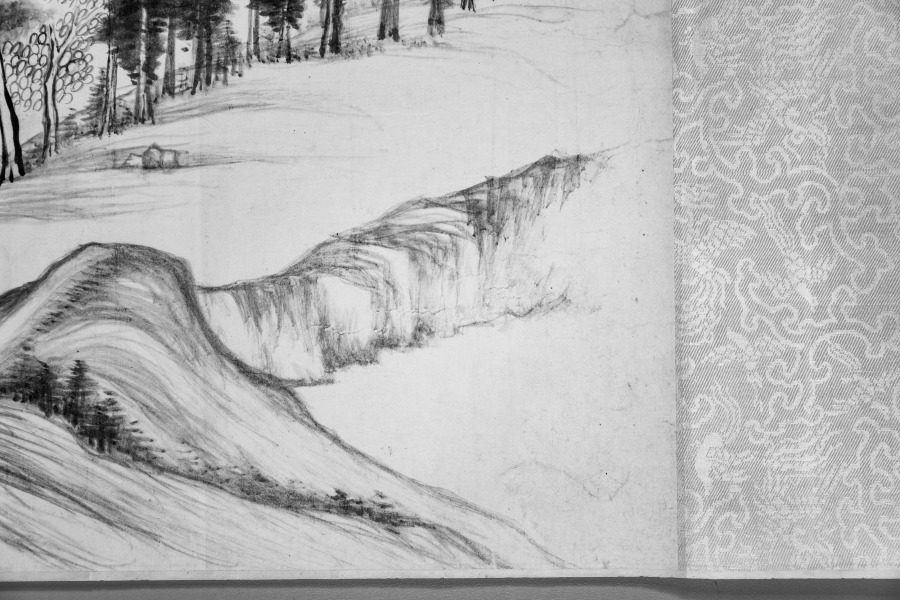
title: River and Mountains on a Clear Autumn Day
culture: China, Ming dynasty (1368–1644)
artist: Dong Qichang (Chinese, 1555–1636)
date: c. 1624–27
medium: Handscroll; ink on Korean paper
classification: Painting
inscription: 黃子久江山秋霽似此，當恨古人不見我也。思翁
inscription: 董文敏每遇高麗鏡面箋，書畫尤為入神。此卷改表紙用之，字跡隱然，兼有朝鮮之印。至於筆法圓秀，真接倪黃。豈文沈所可同日而語也。 康熙庚午中秋後一日，天氣澄爽，重裝初畢，跋於瓶廬。抱瓮翁高士奇。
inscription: Second inscription by Gao Shiqi 高士奇 (1645–1704): On the twenty-third day of the ninth month, the jiaxu year of the Kangxi era [1694], I packed my bags to head north. When my boat passed Wuchang [Suzhou], Mr. Mantang [Song Luo] brought wine to bid me farewell so that we could share our thoughts on our separation in the last few years. I showed him the paintings and calligraphy which I collected and asked his opinions. Since Mr. Mantang does not own any handscrolls by Wenmin [Dong Qichang], I leave this one for him in commemoration of our parting; thus the painting will have a worthy owner and our meeting will become a beautiful story in the future. It is the fourth day after the beginning of winter, with the sky clear and sober. Trees under frost have turned red and yellow, seemingly echoing the brush and ink in the painting. I also ask Mr. Mantang to inscribe a poem to commemorate our meeting so that it will survive forever.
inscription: 1 colophon and 4 seals of Song Luo 宋犖 (1634–1713): Who is the foremost art connoisseur of our dynasty?/ Tangcun [Liang Qingbiao, 1620–1691] is dead, so the title passes to Jiangcun [Gao Shiqi]./ Leaving office, you retired for five years in the Lake region./ Fondling handscrolls and hanging scrolls from morning to evening./ You sent me your collection catalogue Xiao Xia Lu last year;/ It is indeed the true equal of [Zhou Mi's] Yun Yan Guo Yan./ This year you returned to the capital by imperial order;/ Your boat with calligraphy and paintings anchored at the river bank in Suzhou./ When we met each other you did not waste any time for conversation by poured out immediately/ From your "coral net" extraordinary treasures./ You produced incomparable scrolls, with gold-inscribed labels and jade rollers,/ Pouring out from bags and trunks, they were spread in disarray./ Without a word, I rolled and unrolled until my fingers were numbed,/ We sat straight, facing each other quietly, and never felt tired./ For three days we forgot about sleeping and food./ And at times we shouted our joy out loud, forgetting who is host or guest./ Your Dwelling in the Fuchun Mountains and the Yuansheng manuscript/ These peerless works I myself examined with delight./ As an added pleasure to the farewell dinner under the Maple Bridge,/ You allowed me to hold again this handscroll by Dong Qichang--/ The Misty River and Piled Peaks [by Zhao Mengfu] and this Clear Autumn Day are two extraordinary masterpieces./ In showing such life and spirit with "qi yun." the artists were truly "men of heaven."/ The Clear Autumn Day is not even three feet long,/ Painted on tributary Korean paper, it shines like silver./ Every building up and every turn of the mountains imitates nature,/ Every tree and every rock is removed from the commonplace./ From the beginning, the theory of poetry is the theory of painting,/ Like the lotus and the morning sunshine, they complement and refresh each other./ The artist's inscription regrets that "the Old Masters cannot see my scroll."/ Huang Gongwang would have agreed in his grave./ The vermilion of the seals glitter and dazzles the eyes,/ These added accessories are as valuable as jade./ You are very kind to give it to me,/ The feelings expressed in your inscription are so sincere./ Wanting to refuse, but unable, I accept it to respect your wish,/ And taking off my gown and cap I wrapped it with care./ You asked me to write a long poem in commemoration of this beautiful occasion,/ I am too ashamed that my effort in response is so poor and inadequate./ Returning home, I unrolled it under candlelight, trying to write the colophon,/ The light of the waning moon shines at the foot of the mossy wall./ Earnestly humming and brows knit in deep thought, I try to compose;/ The verses are not outstanding, but the facts are real./ With this poem recorded at the end of the scroll, I mail it to you for approval,/ This poem and this painting shall outlast a thousand springs. (Translation by LYSL/HK/WKH)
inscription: 1 colophon and 2 seals of Shao Changheng 邵長蘅 (1637–1704); 2 inscriptions and 14 seals of the Qianlong 乾隆 emperor (r. 1736–95); 1 seal of the Jiaqing 嘉慶 emperor (r. 1796–1820); 3 seals of the Xuantong 宣統 emperor (r. 1908–11); 1 seal unidentified.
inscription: [印] 朝鮮國王之印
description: Dong Qichang had a tremendous impact on the artistic practices and historiography of later generations; his works and writings shaped literati aesthetics. Here, Dong places an abstract landscape composition diagonally across the picture plane, configured to recall earlier masters and simultaneously express his own personal style. Dong’s inscription claims, Huang Gongwang’s Autumn Day, looks like this. I truly regret the master has not seen my work. In fact, Dong Qichang may have had Dong Yuan’s Xiao and Xiang Rivers in mind, a work he owned and considered a key work in Chinese art history.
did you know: The painting has an imprint of a Korean seal that reads "Seal of the king of Joseon."